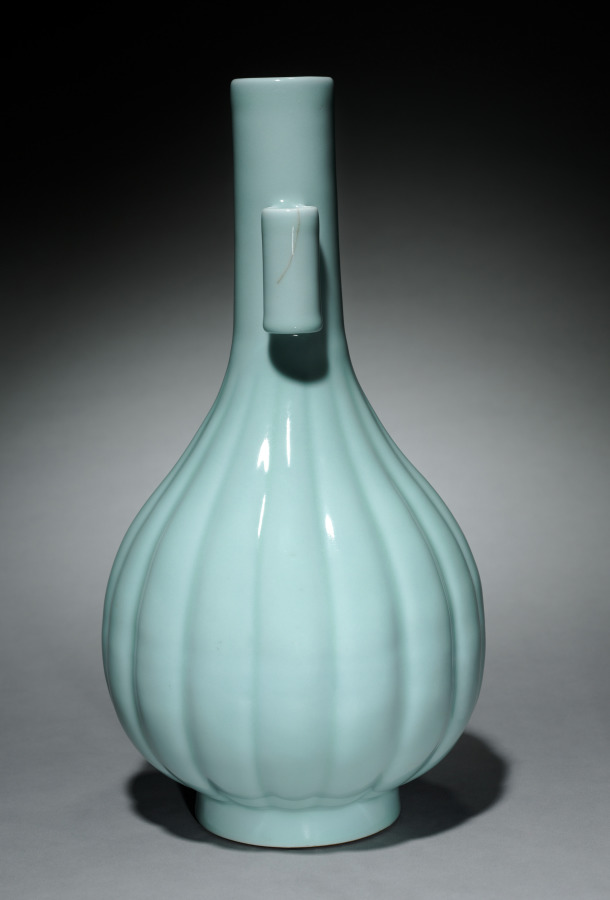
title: Melon-Shaped Fluted Vase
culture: China, Jiangxi province, Jingdezhen kilns, Qing dynasty (1644-1911), Qianlong mark and reign (1736-95)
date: 1736–95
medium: porcelain with clair-de-lune glaze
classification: Ceramic